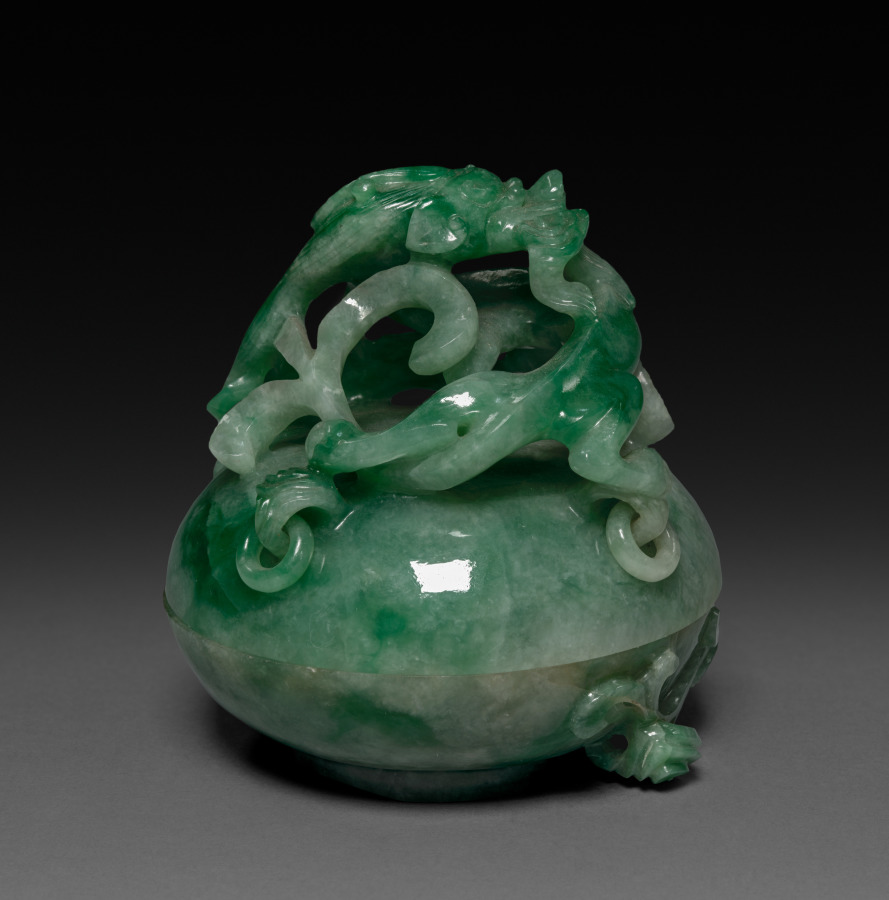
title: Three-Sectional Altar Group: Small Bowl with Carved Dragon with Lid and Base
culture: China, Qing dynasty (1644-1911)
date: 1644–1911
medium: jade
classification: Jade